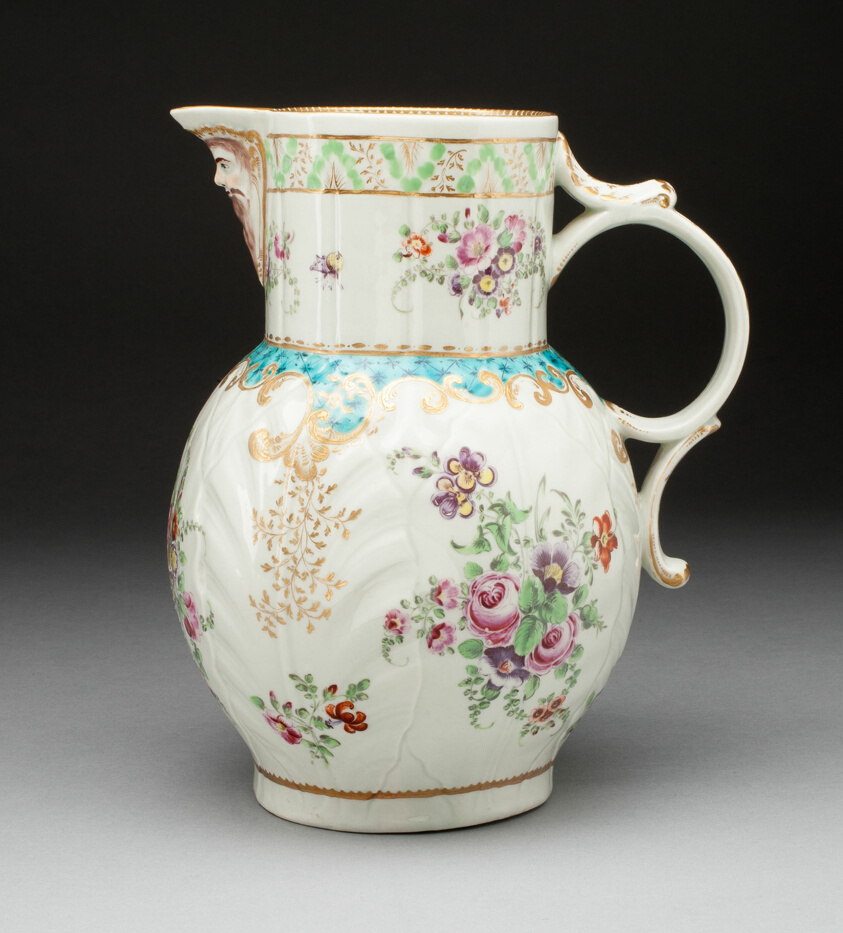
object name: Ceramics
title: Jug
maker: Worcester Porcelain Factory (Warmstry House Period, 1751–1783); Worcester, England, founded 1751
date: c. 1775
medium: Soft-paste porcelain, polychrome enamels and gilding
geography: Worcester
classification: porcelain; tableware; european decorative arts; ceramics